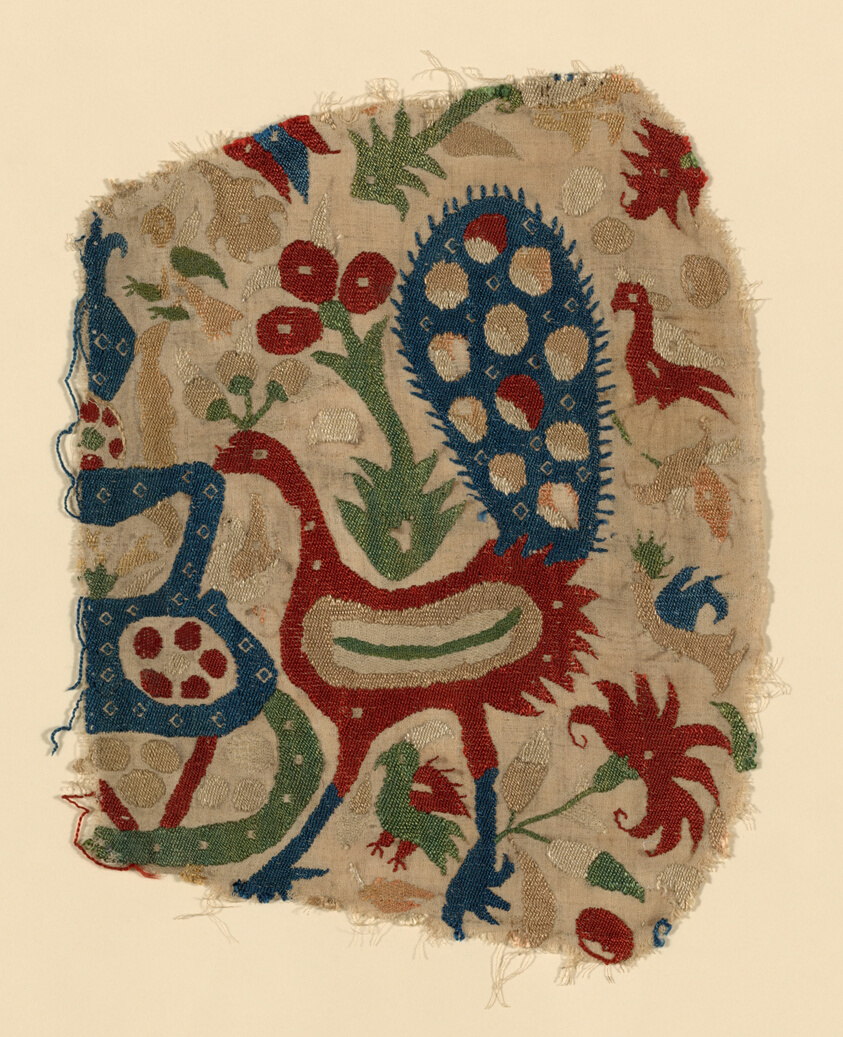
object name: Textile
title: Fragment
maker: Greece, Epirus Province, Ionian Island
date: 17th century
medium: Linen, plain weave; embroidered with silk in running (pattern darning), satin, split, and stem stitches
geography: Greece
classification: textile; needlework (visual works)